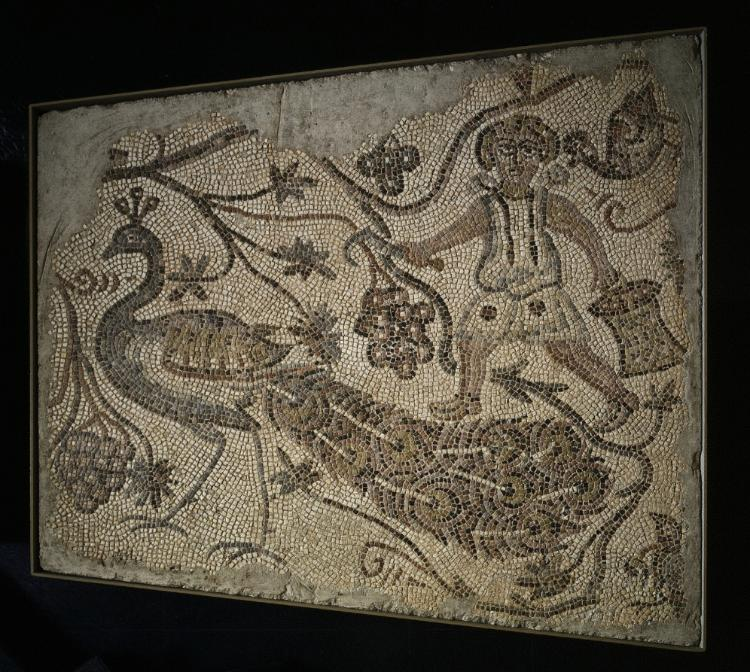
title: Floor Mosaic Panel: Grape Harvester with Peacock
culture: Byzantium, Northern Syria, Byzantine period, 5th century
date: 400s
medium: marble tesserae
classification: Mosaic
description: This group of mosaics may be from a church at Maaut El Naaman in northern Syria. The panel depicting Adam and Eve includes a Greek inscription that translates as: "And they ate, [and they] were made naked," from the book of Genesis (3:7–8). It is possible that the mosaic belonged to a pavement illustrating the Garden of Eden. The Grape Harvester with a Peacock also conveys well-known Christian themes. The grapes represent the Eucharistic wine and thus the blood of Christ, while the peacock was a symbol of immortality.